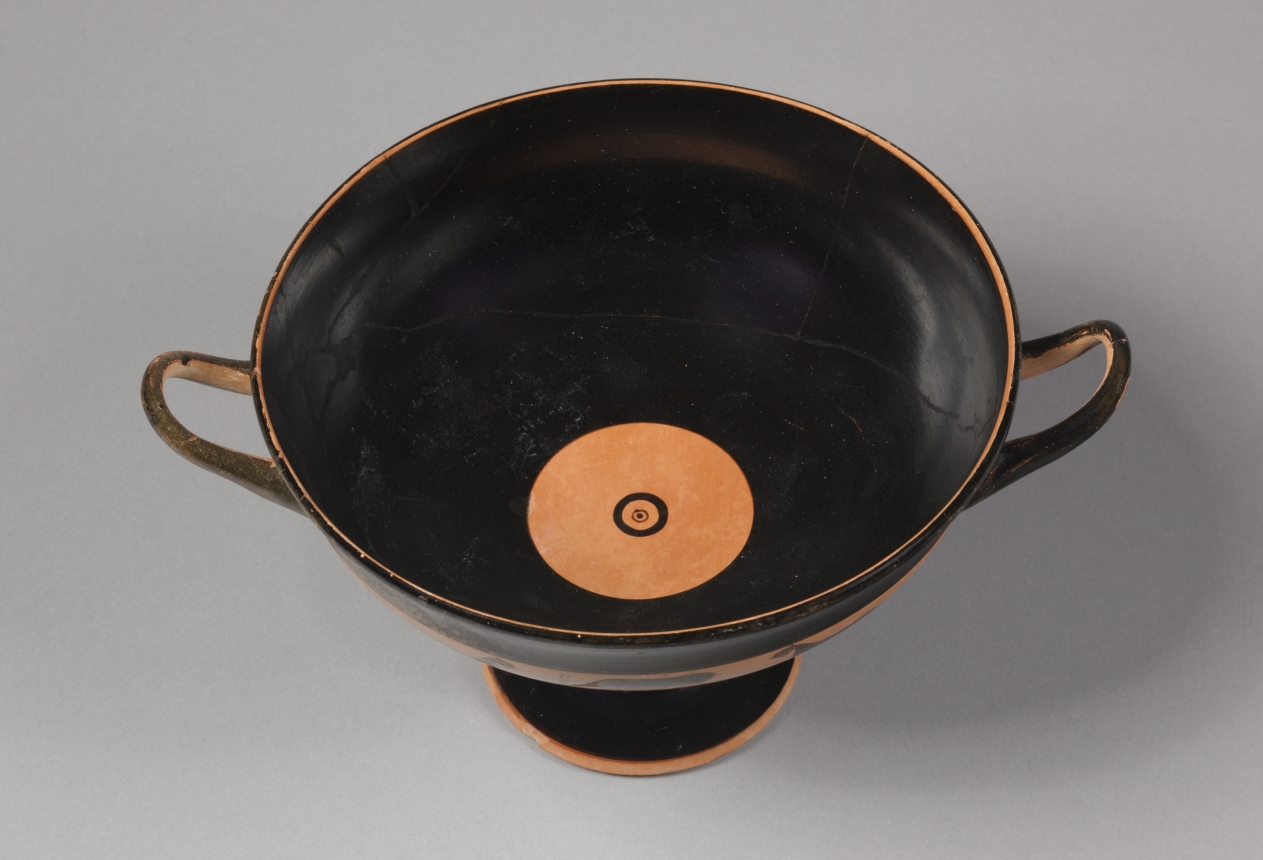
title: Black-Figure Band Cup: Stags and Panthers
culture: Greece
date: c. 540 BCE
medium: ceramic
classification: Ceramic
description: The two sides of this drinking cup are nearly identical, each with a reserved band holding a grazing stag between two panthers. A single palmette appears on either side of each handle, while a reserved circle inside the bowl holds a dot within concentric circles.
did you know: Band cups feature figural decoration only within a reserved band aligned with the handles.